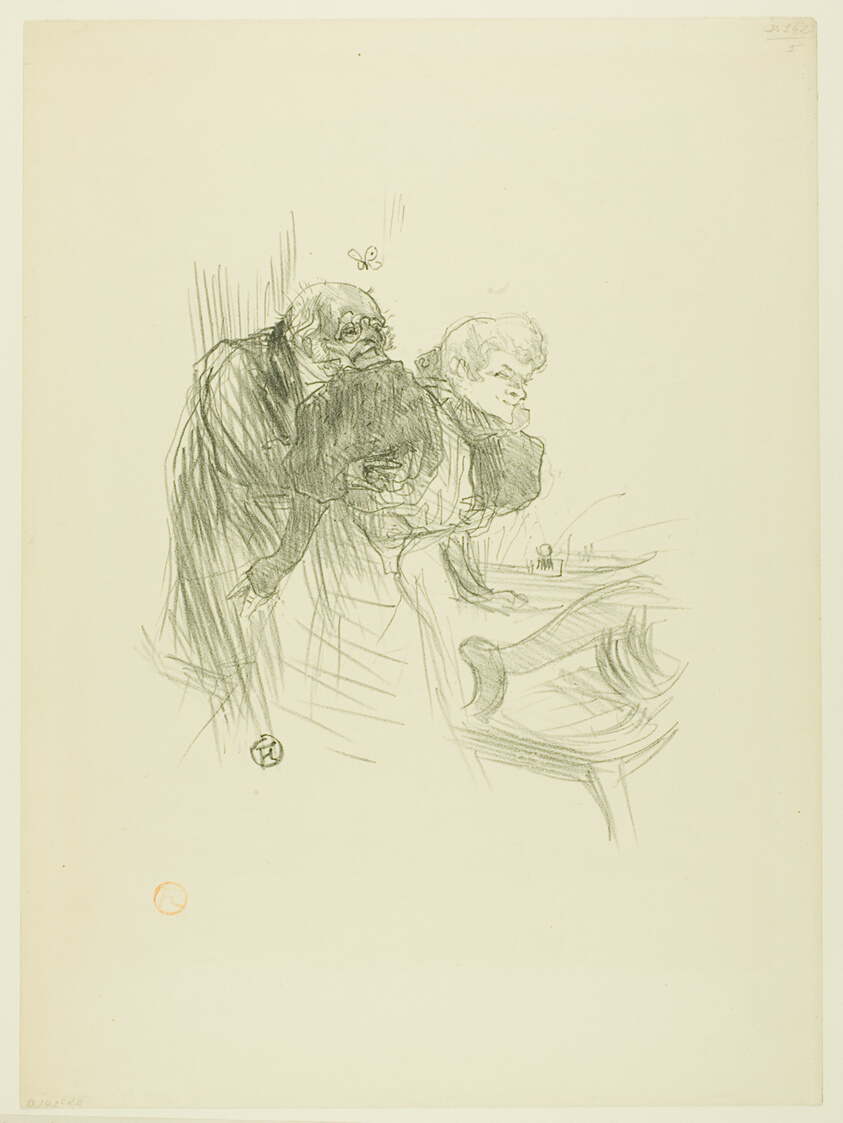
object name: Print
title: The Prayer of the Polish Jews, from Au Pied du Sinaï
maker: Henri de Toulouse-Lautrec (French, 1864-1901)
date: 1897, published 1898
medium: Color lithograph on cream wove paper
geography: France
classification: lithograph; print; prints and drawing